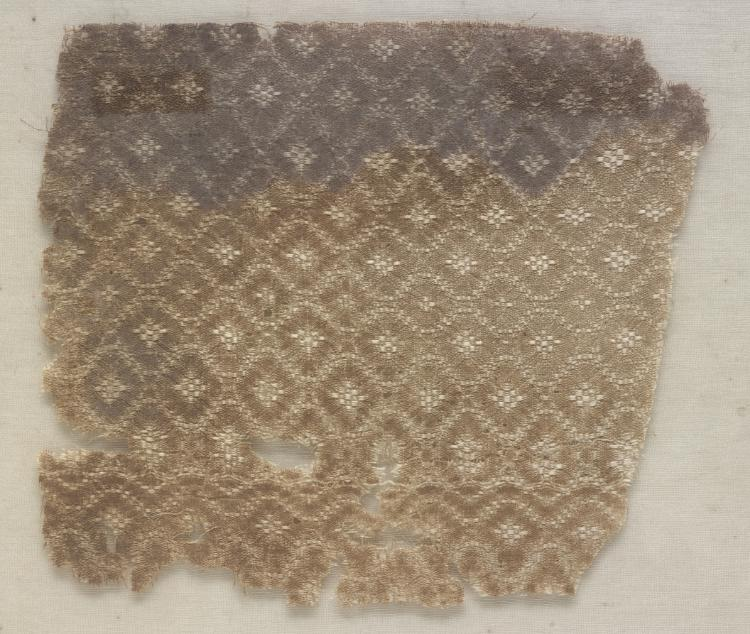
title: Silk Fragment, Probably from a Tunic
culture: Syria ?, 8th century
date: 8th century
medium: patterned tabby weave; silk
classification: Textile